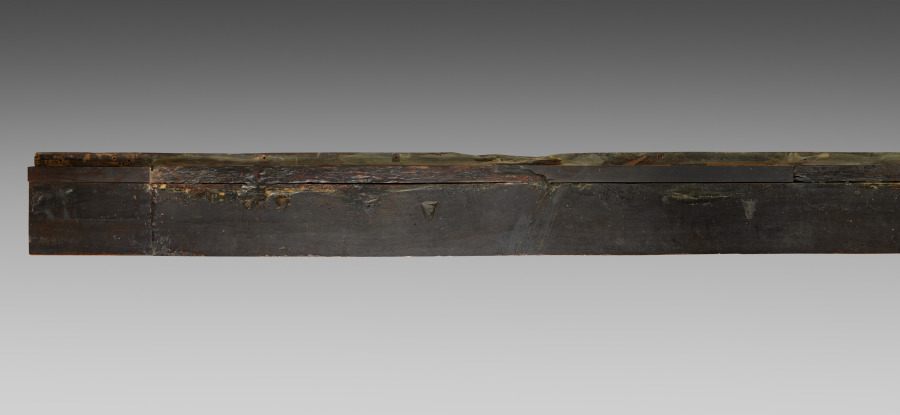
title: Upper Paneling from a Sacristy Armoire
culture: Italy, Florence, late 15th century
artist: attributed to Giuliano da Maiano (Italian, 1432–1490)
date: c. 1460–1475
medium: walnut, inlaid with holly and ebony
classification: Furniture and woodwork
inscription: in four of the five panels is the Medici badge of a jeweled ring wound with a ribbon or bannerole, on which is inscribed the motto "Semper." The frieze in the cornice contains part of a quotation from the Vulgate, Paul's epistle to the Romans, Chapter XI.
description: The imagery on the inset panels is the result of a technique known as intarsia, the skilled inlaying of woods of different colors to create a type of mosaic, popular during the 15th and 16th centuries in Italy for the decoration of paneling and furniture for studies, small rooms, and church sacristies. This large set of five intarsia panels comes from an unknown Florentine church. In its original setting the panels rested upon a row of similarly decorated cupboards (a sacristy armoire) which were used for the storage of liturgical vestments and books. This panel would have therefore been seen at eye level. The central panel depicts the Resurrection of Christ. The two outside panels depict the emblem of Lorenzo de Medici-three plumes encircled by a jeweled ring above a scrolling ribbon containing the Latin word SEMPER (Always). Lorenzo de Medici (1449-92) was the ruler of Florence when this sacristy armoire was constructed and was the likely patron. It seems to be the work of Giuliano da Maiano, an architect and intarsia-maker also responsible for the intarsia in the sacristy of Florence Cathedral.